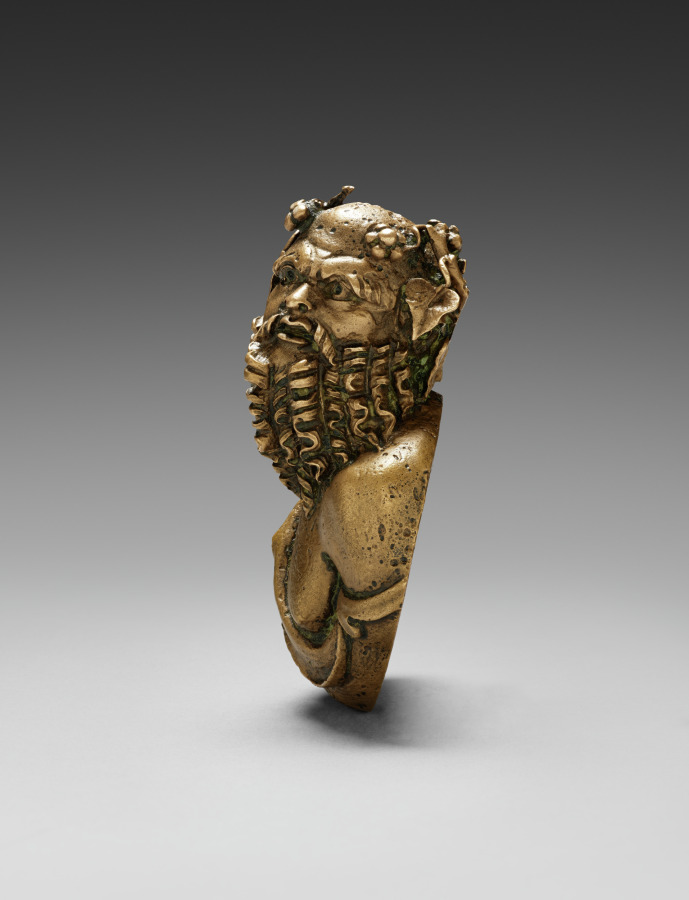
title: Silenus Bust for a Couch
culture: Italy, Roman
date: 1–125 CE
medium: bronze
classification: Sculpture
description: This bust of Silenus was part of the fulcrum or armrest of an ancient Roman couch. Silenus was the tutor and companion of Bacchus, the Roman god of wine. He is shown with a long curly beard, bushy eyebrows, and wearing a garland of ivy vines with berries. His deerskin robe, tied by the animal’s hoof, falls off his shoulder, suggesting drunkenness. The bust would have been placed at the base of the armrest where it met the seat of the couch, while an animal head likely decorated the top. As is the case with many Roman objects, Romans adapted their couch style and decoration from the Greeks.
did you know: This silenus’s beard is made up of exactly ten ringlets of curls.